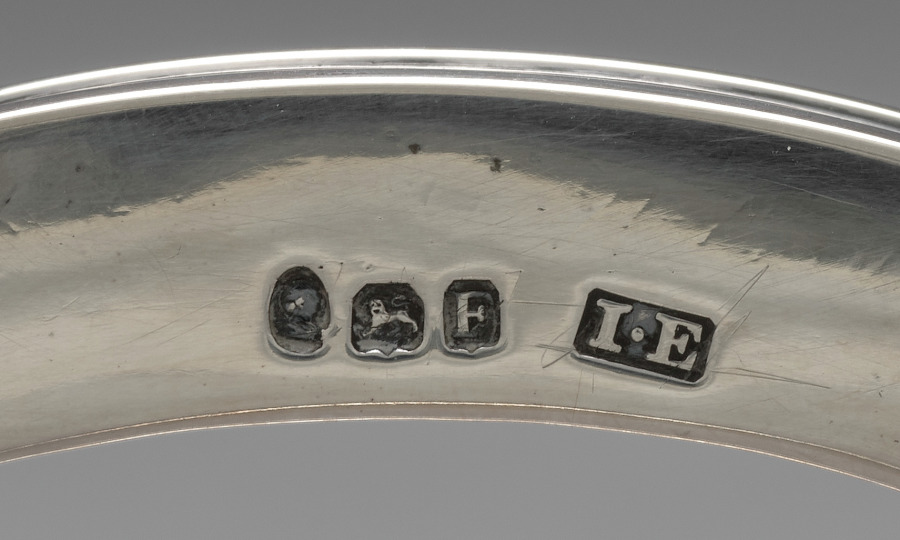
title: Stand for a Hot Water Jug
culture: England, early 19th century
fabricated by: John (British) Edwards (British)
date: 1800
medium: silver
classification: Silver